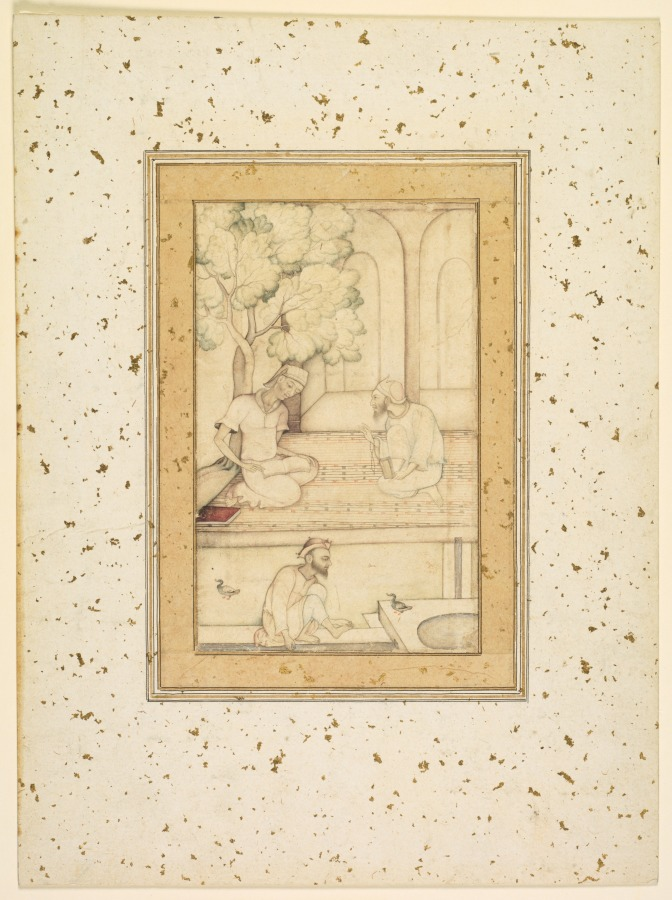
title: Kabir and Two Followers on a Terrace (recto)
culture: India, Mughal, 17th century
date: c. 1610–1620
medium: Gum tempera, ink, and gold on paper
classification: Painting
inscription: verso: four lines of nast 'aliq calligraphy with illuminated panels, with illuminated panels, ink gold and opaque watercolor on paper